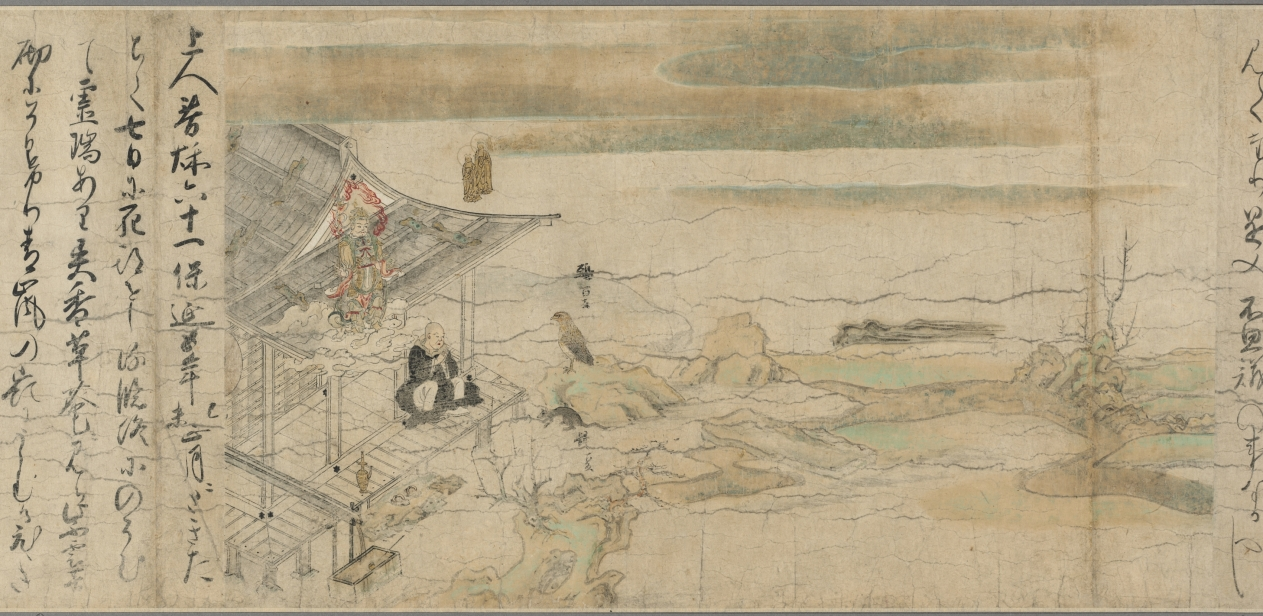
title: The Illustrated Miraculous Origins of the Yūzū Nenbutsu School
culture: Japan, Kamakura period (1185–1333)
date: early 1300s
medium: Handscroll; ink, color, and gold on paper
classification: Painting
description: This painting is the second of a set of two illustrated handscrolls. The first scroll depicts the biography of the Japanese Buddhist monk Ryōnin. This scroll begins with scenes of Ryōnin’s death and relates episodes illustrating the efficacy of following his teachings. Ryōnin asserted the total interconnectedness of all things and the spiritual benefit of chanting the name of the Buddha Amida for one another.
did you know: The other scroll from this two-scroll set belongs to the Art Institute of Chicago.